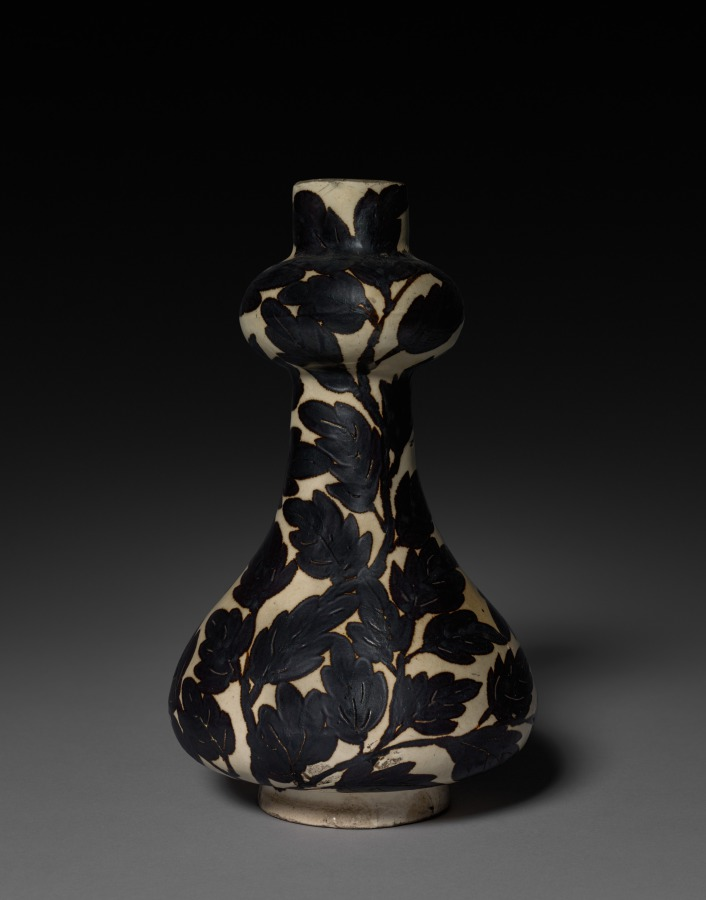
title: Gourd-shaped Vase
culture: China, Ming dynasty (1368–1644)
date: 1368–1644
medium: porcelain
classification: Ceramic